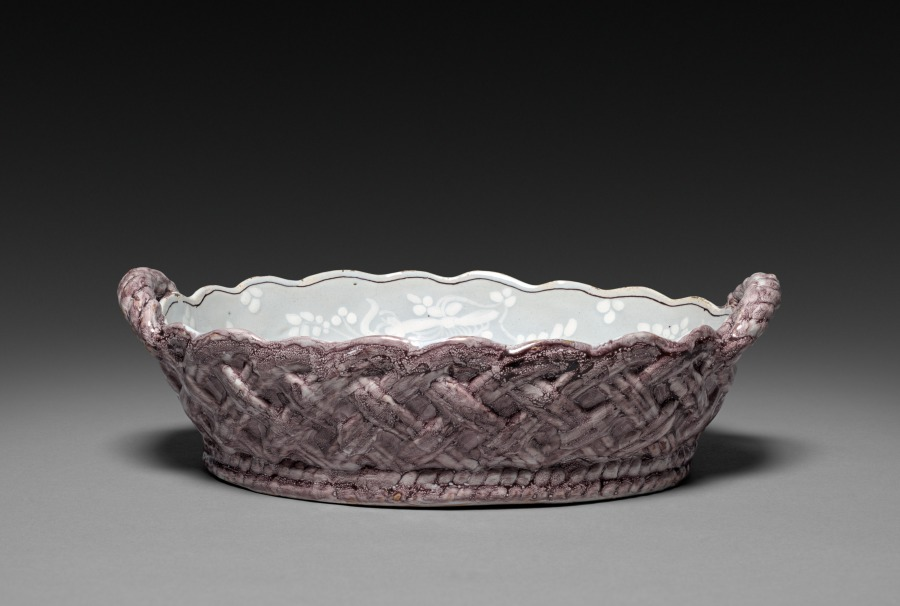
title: Basket-Shaped Bowl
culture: France, 18th century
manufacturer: Saint-Amand-les-Eaux (French)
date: c. 1760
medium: faience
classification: Ceramic